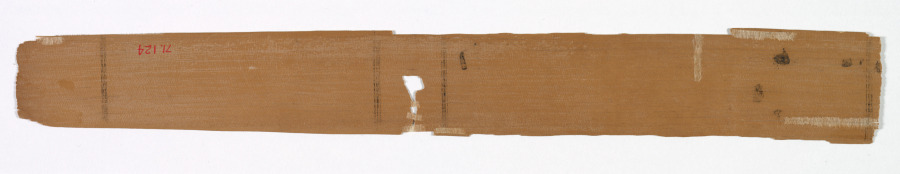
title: Monk Teaching Lay Disciple: Colophon page from a Kalpa-sutra and Story of Kalakacharya of Devachandra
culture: Western India, Gujarat, Patan (Anahillapura), reign of King Sarangadeva of the Vaghela dynasty (1275-1297)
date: 1279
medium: Gum tempera and ink on palm leaf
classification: Painting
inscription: Sri Anahillapure Maharajadhiraja Sri Sarangadevasya Vijayarajye Likhitam on the fifth day of the bright half of Jyestha, Samvat 1336" (AD1279)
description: Before the use of paper, Indian books were written on palm leaves, bound by a string passed through the hole in the middle of the pages, which were turned horizontally. Often the paintings do not reference the story of the text because they may have functioned as adornments rather than illustrations. Virtuous scenes, such as a layman venerating a Jain monk, as seen on this page, were apparently thought to beautify a sacred text and made it more costly and visually appealing. By adding painted adornments, a donor can accrue greater religious merit.